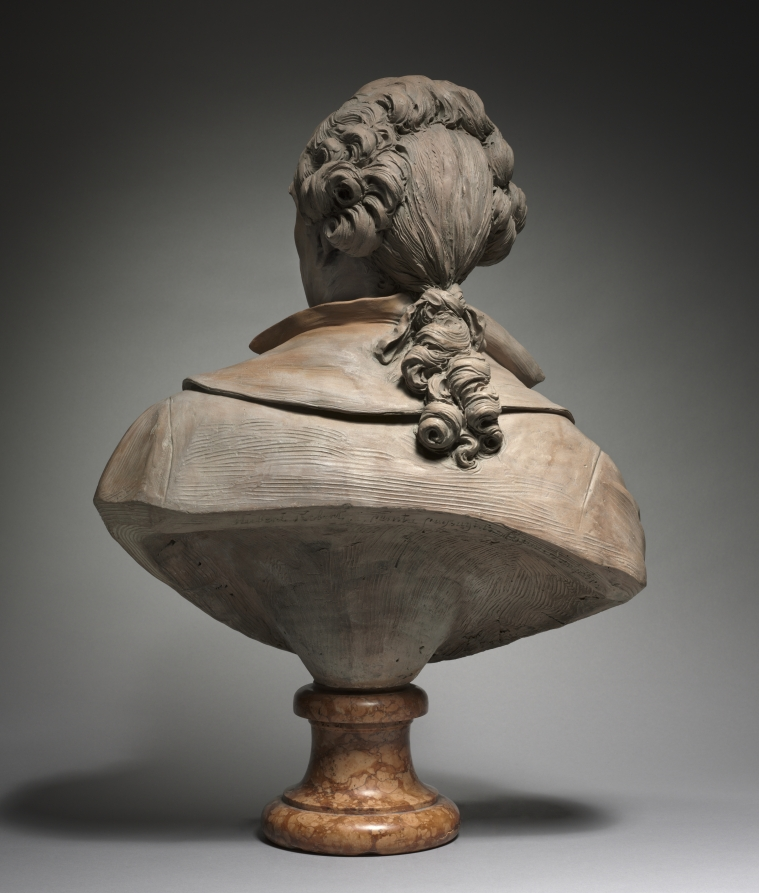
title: Portrait of Hubert Robert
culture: France, early 20th century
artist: copy after Augustin Pajou (French, 1730–1809)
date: early 1900s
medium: terracotta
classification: Sculpture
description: James David Draper published this work in 1997 as a 19th-century copy after Pajou, one of a number of copies after the primary version in Valence, partly owing to the slightly stiffer carving of the Cleveland bust and the lack of psychological depth compared to the autograph version. A thermoluminescence test, which determines the age of fired ceramics through small samples of the clay, proved that the work could not be dated before the late 19th century, and could easily date to the 20th century. Many of the copies after Pajou may well postdate Henri Stein's 1912 monograph, when the originals became available in photographic form, and the Cleveland bust is one of the stronger and most convincing examples.